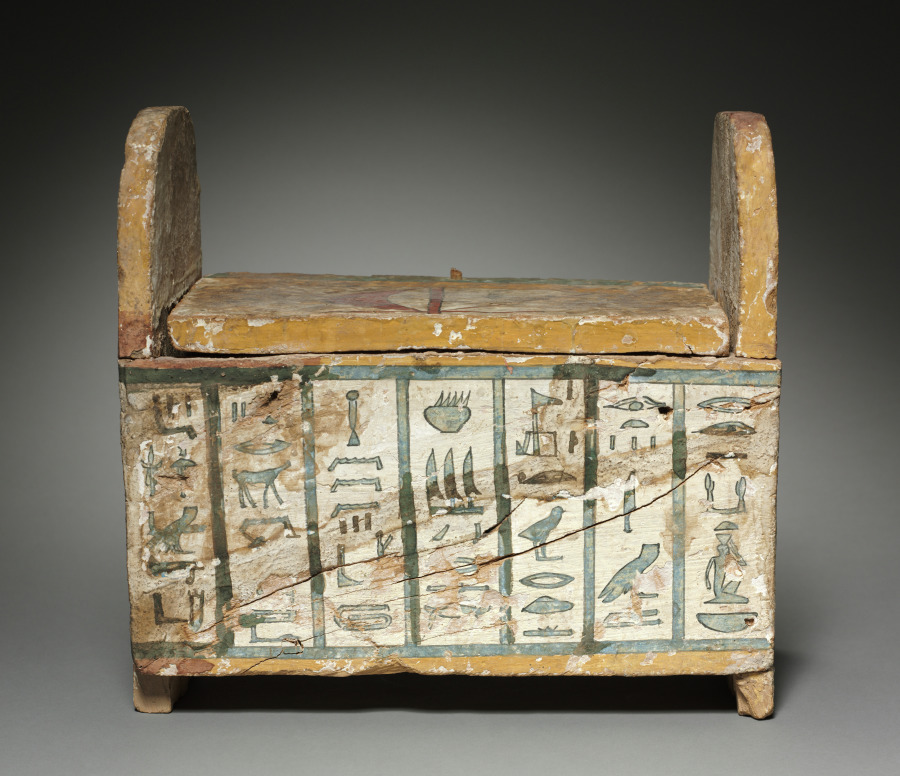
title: Shawabty Box of Ditamenpaankh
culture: Egypt, Late period (715–332 BCE), Dynasty 25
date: 715–656 BCE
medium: painted wood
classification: Funerary Equipment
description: High demand for shawabtys in the Late Period, a time when as many as 400 or more shawabtys were placed in the tomb with the deceased, gave rise to a specialized container for storing them: the shawabty box. This example is inscribed for the lady of the house, Ditamenpaankh, and was probably one of a pair originally made for her. The single-masted boat on the box’s lid is perhaps an allusion to the pilgrimage of the deceased to the holy city of Abydos, the cult city of Osiris, king of the dead. The shawabtys inside are crude, mass-produced examples cast in an open mold. Made of terracotta, their blue paint imitates more costly shawabtys made of faience. As for the shawabty spell, it has been removed from its traditional location on the shawabty’s front and relocated onto the sides of box, where it needed only to be written once, thus expediting production.